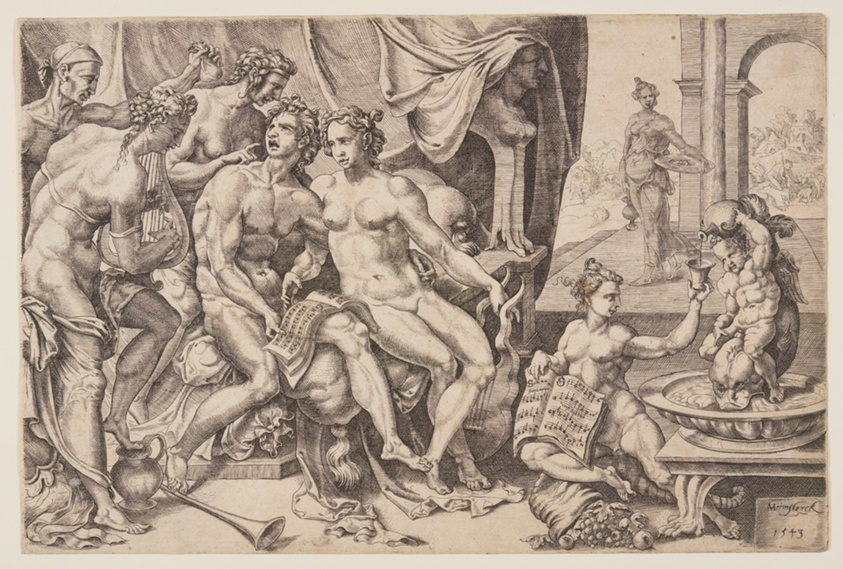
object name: Print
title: The Prodigal Son Squandering his Inheritance on Harlots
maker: Cornelis Bos (Flemish, c. 1510-before 1566); after Maerten van Heemskerck (Dutch, 1498–1574)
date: 1543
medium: Engraving on ivory laid paper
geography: Flanders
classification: print; paper; prints and drawing; engraving